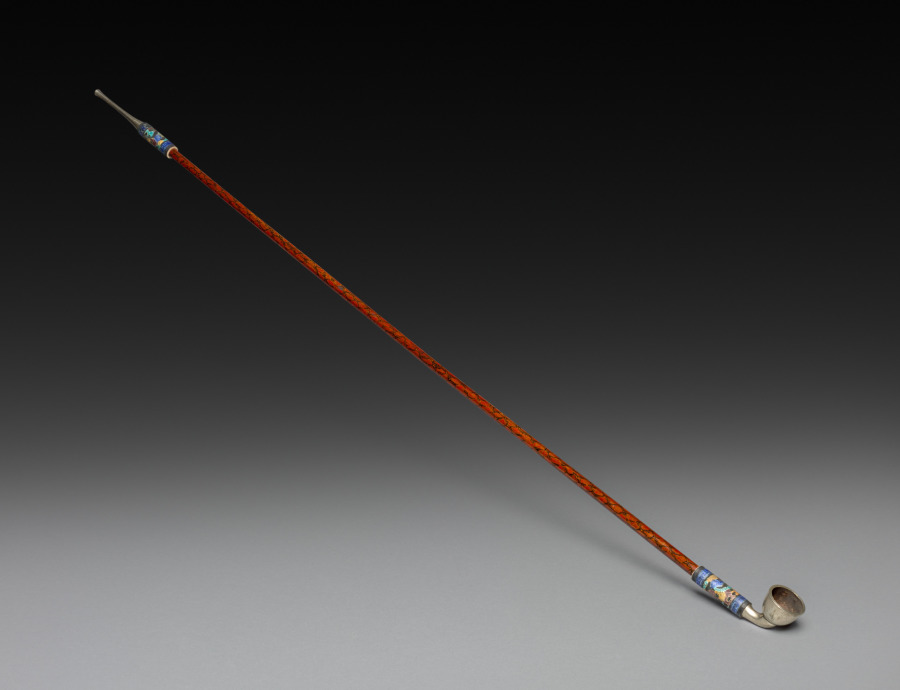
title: Tobacco Pipe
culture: Japan, Edo period (1615–1868)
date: 1700s to mid-1800s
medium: wood and metal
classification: Miscellaneous